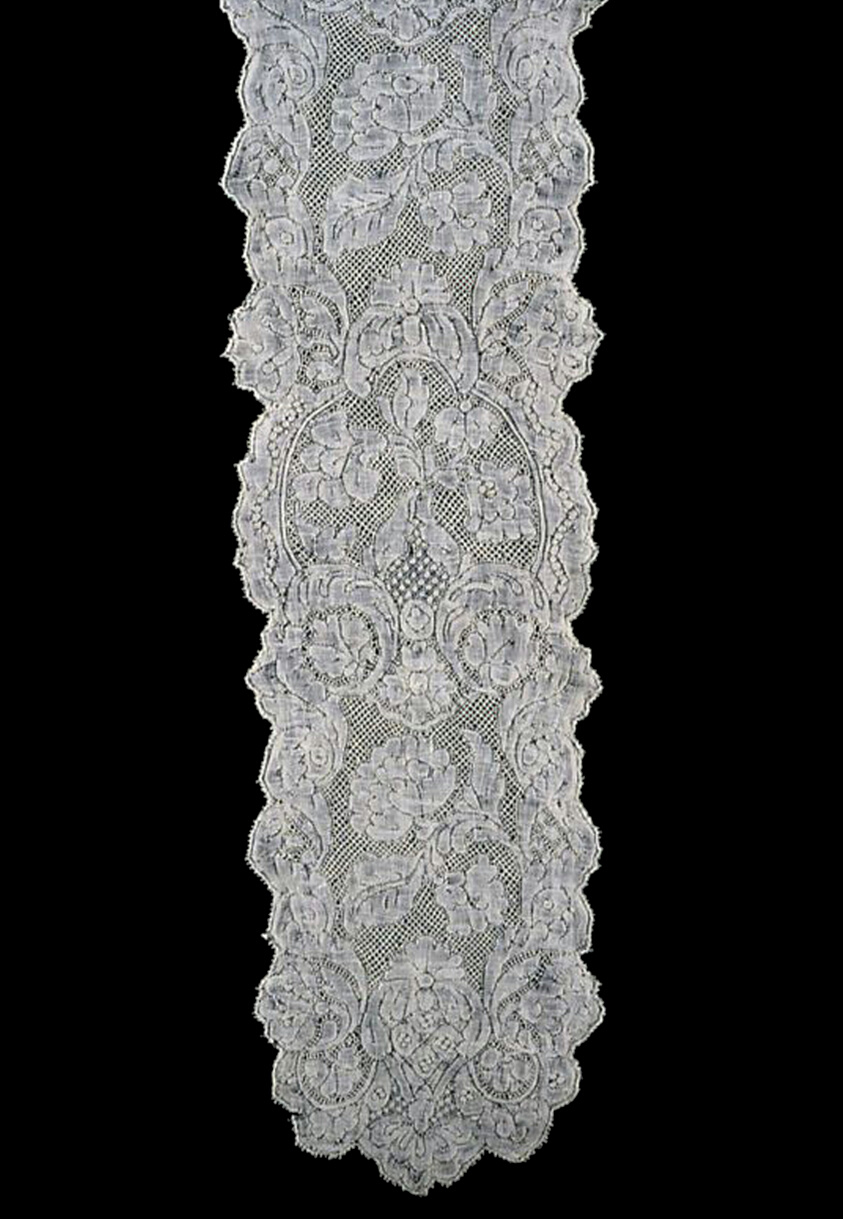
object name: Costume and Accessories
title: Lappet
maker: France, Valenciennes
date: 1740s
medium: Linen, bobbin straight lace of a type known as "Valenciennes" with a five hole mesh ground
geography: France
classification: costume accessory; lace - bobbin; lace; textile; costume; costume accessory - headdress; costume accessory worn above the waist